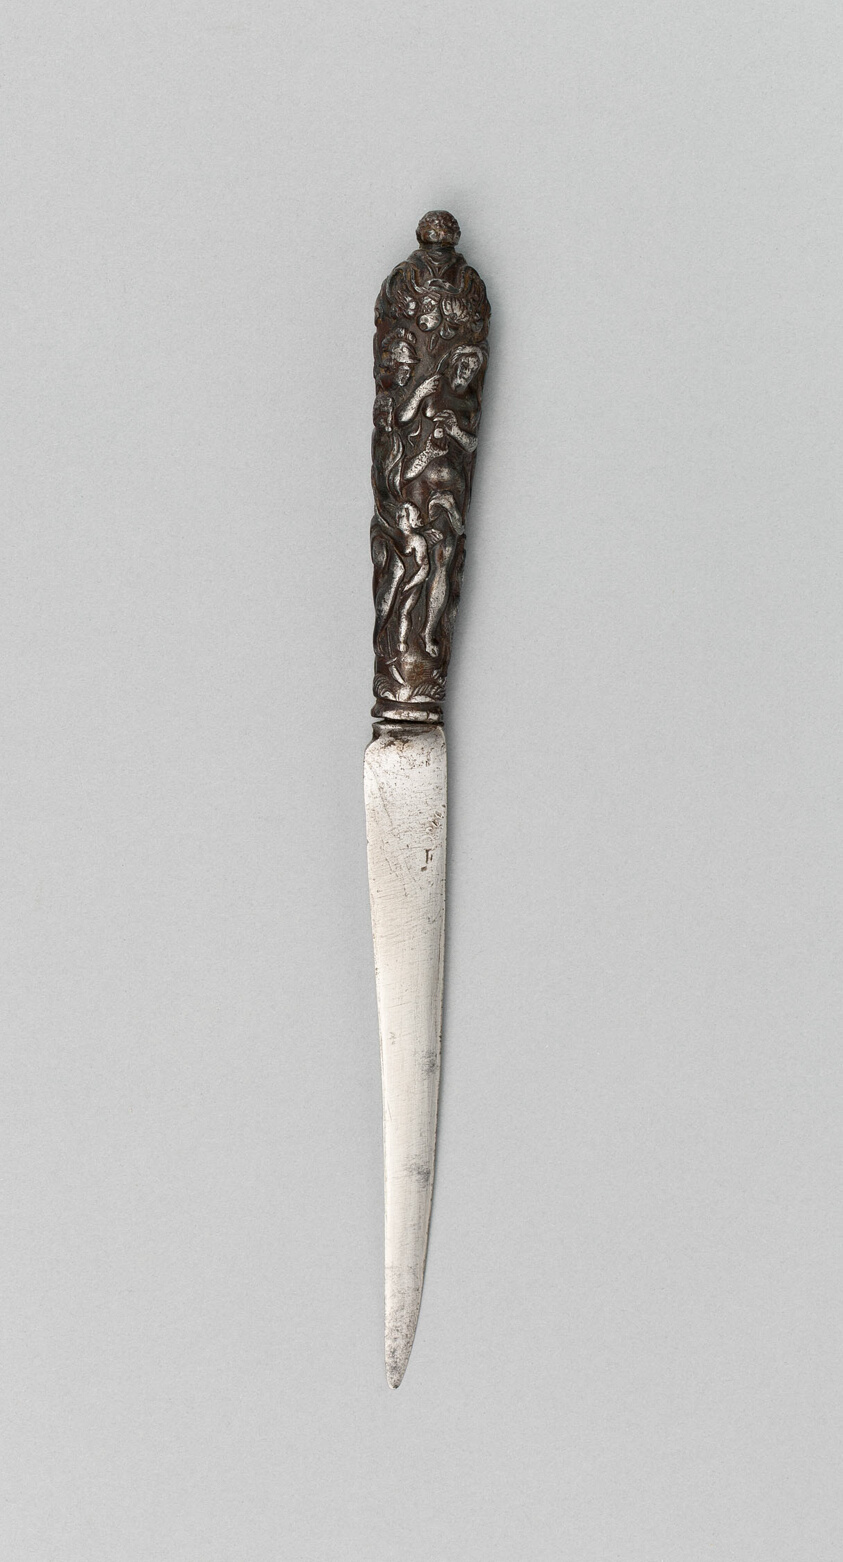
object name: Arms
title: Knife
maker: Probably Italian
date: 17th century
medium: Steel and iron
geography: Europe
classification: cutlery; arms and armor, miscellaneous; arms and armor; arms